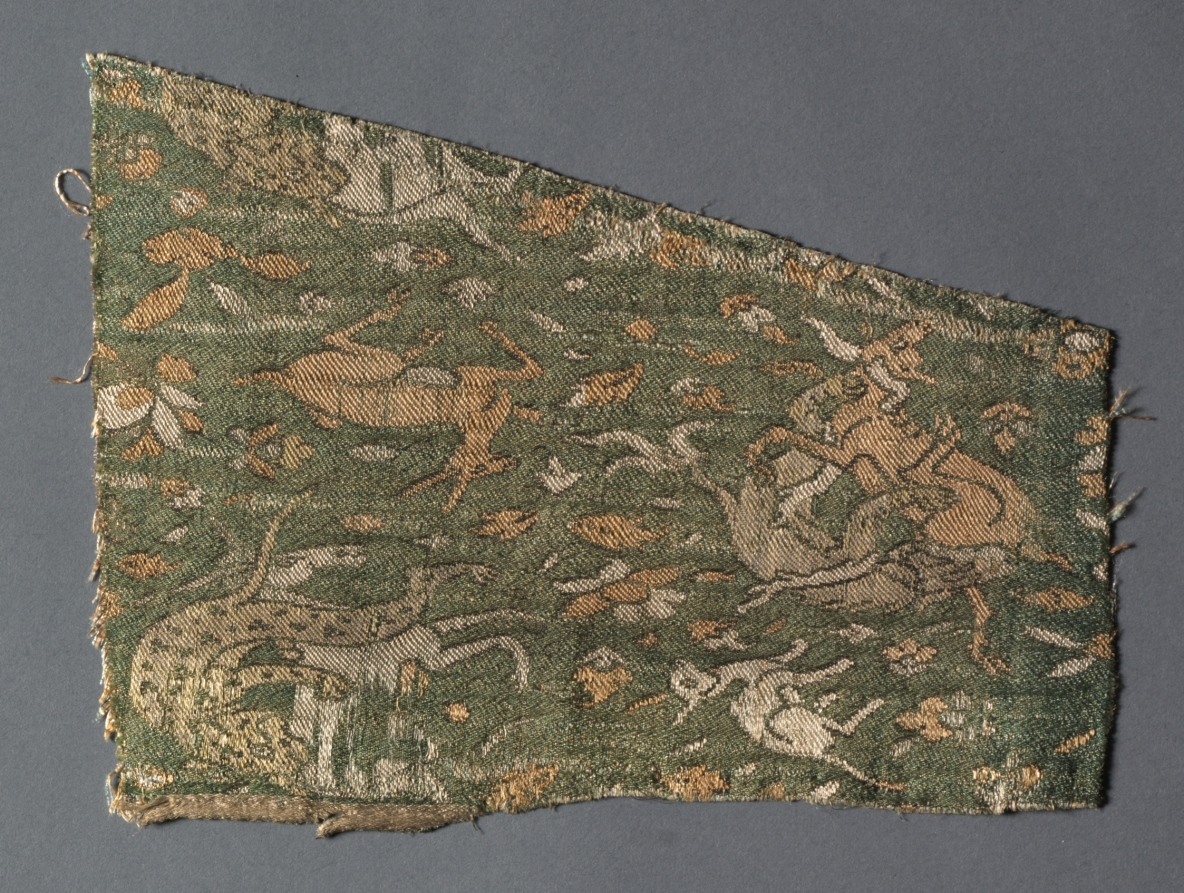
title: Lampas with scenes of wild animals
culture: Iran, Safavid period (1501–1722)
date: 1500s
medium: Silk and gold: lampas weave, brocaded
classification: Textile